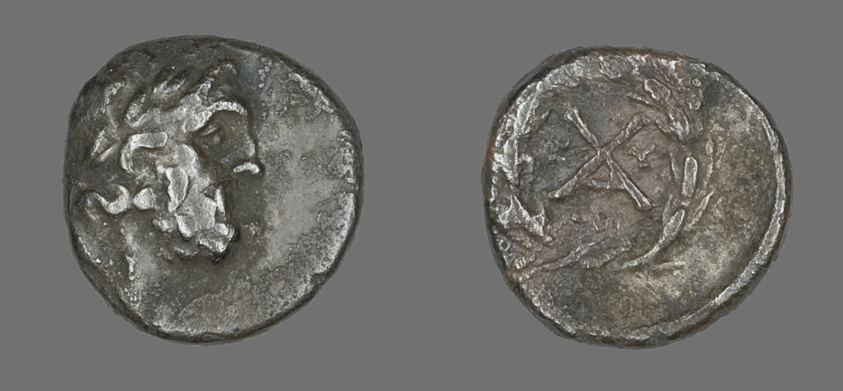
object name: Coin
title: Hemidrachm (Coin) Depicting the God Zeus Amarios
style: greek, ancient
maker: Greek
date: 222-146 BCE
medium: Silver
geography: Ancient Greece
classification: coin; ancient art